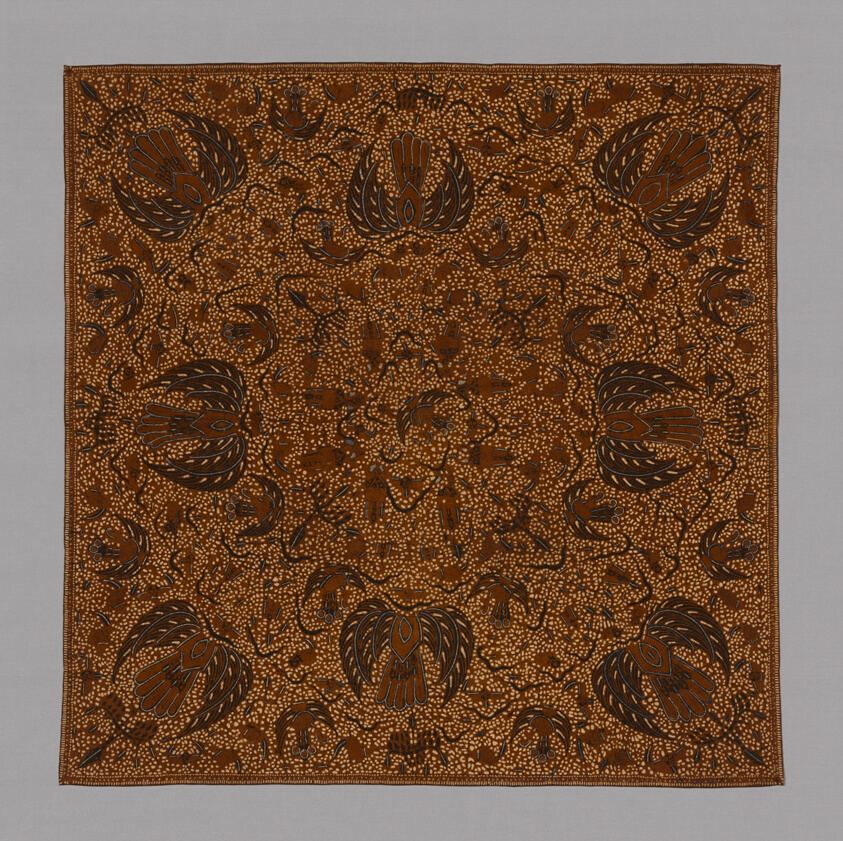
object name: Costume and Accessories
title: Headcloth (Iket Kepala)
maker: Indonesia, Central Java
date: Late 19th century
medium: Cotton, plain weave; hand-drawn wax resist dyed (batik tulis)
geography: Java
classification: textile; weaving; costume; dress (garment); clothing